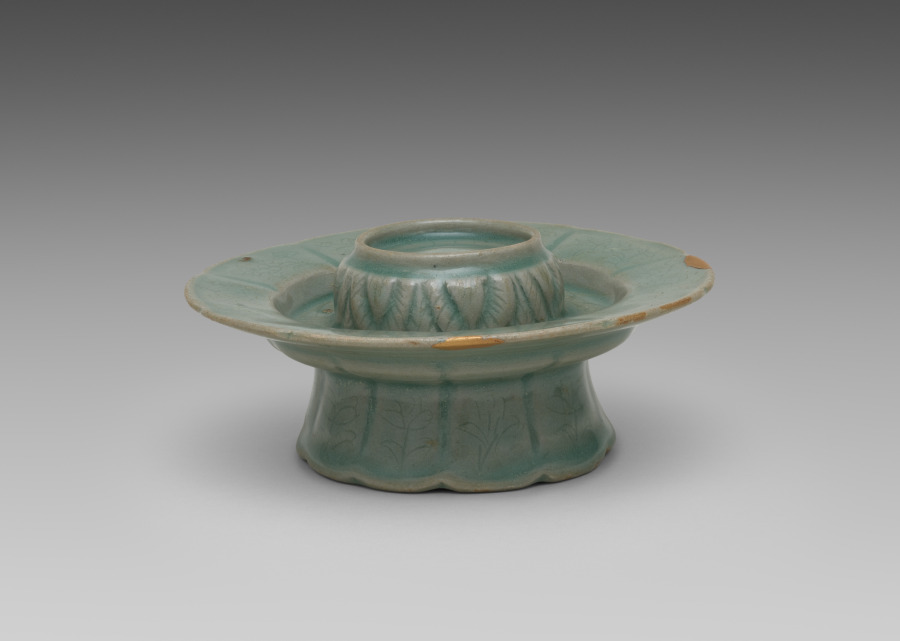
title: Floral-shaped Cup Stand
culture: Korea, Goryeo dynasty (918–1392)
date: 1100s-1200s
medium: celadon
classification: Ceramic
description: As early as the seventh century, the practice of drinking tea became an important part of elite culture in Korea. In enjoying teas, elites commissioned a variety of types of utensils and vessels including this delicate-looking cup stand, not only to make their tea-drinking experience more exciting, but also to show their refined taste.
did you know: According to a historical record, the cultivation of tea in Korea was initiated with green tea plant seeds from China by royal order in 828.